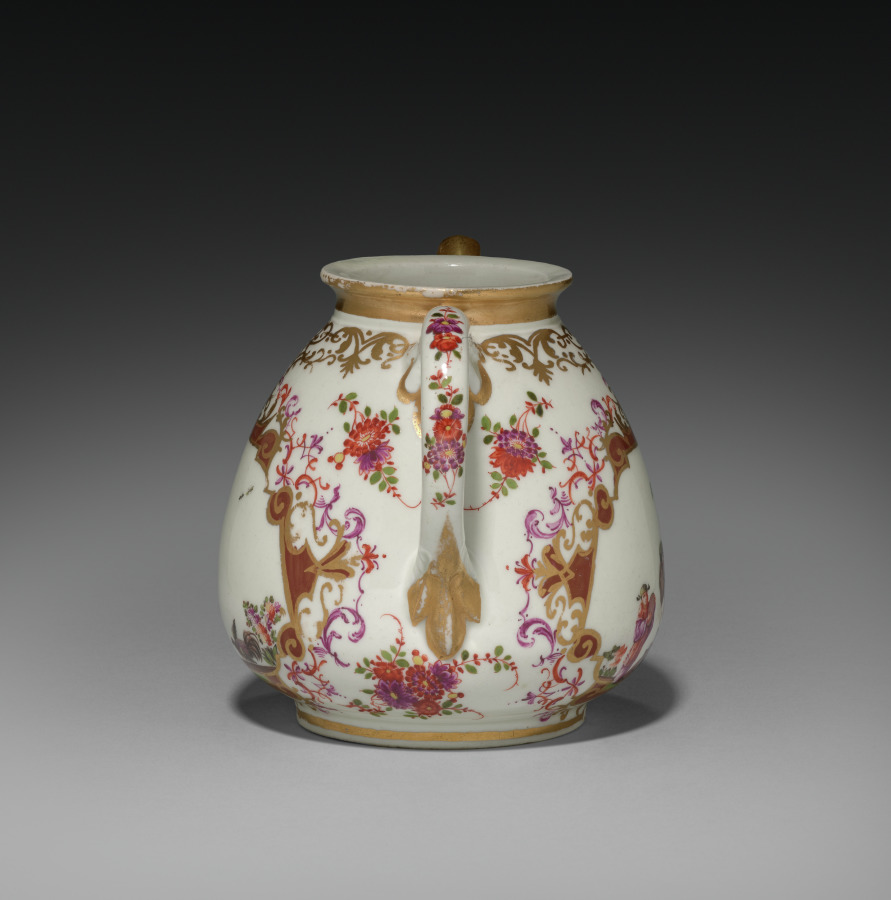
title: Tea Pot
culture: Germany, Meissen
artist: Meissen Porcelain Factory (German, est. c. 1710)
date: c. 1723–24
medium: gilt porcelain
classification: Ceramic